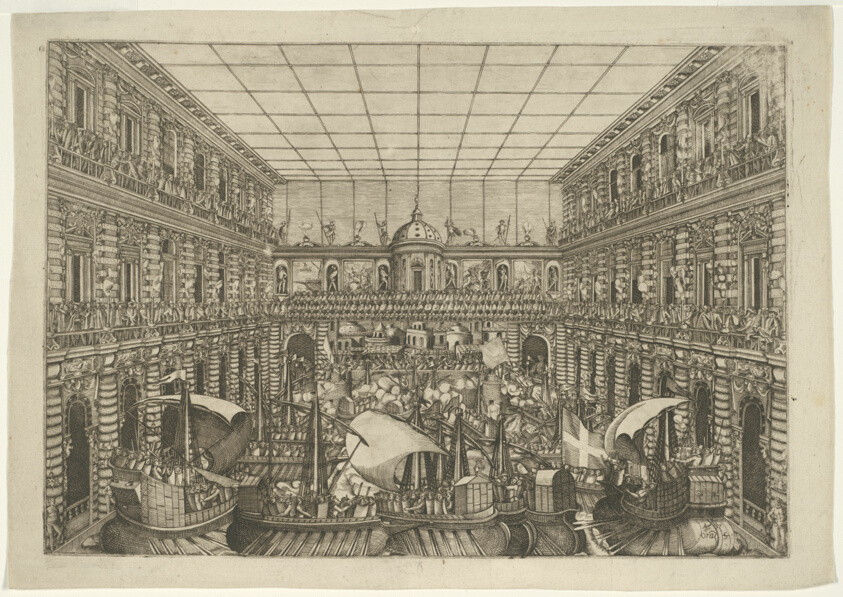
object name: Print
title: Naumachia in the Courtyard of Palazzo Pitti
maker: Orazio Scarabelli (Italian, active c. 1580-1600)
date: 1592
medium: Etching in black on cream laid paper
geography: Italy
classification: etching; paper; print; prints and drawing